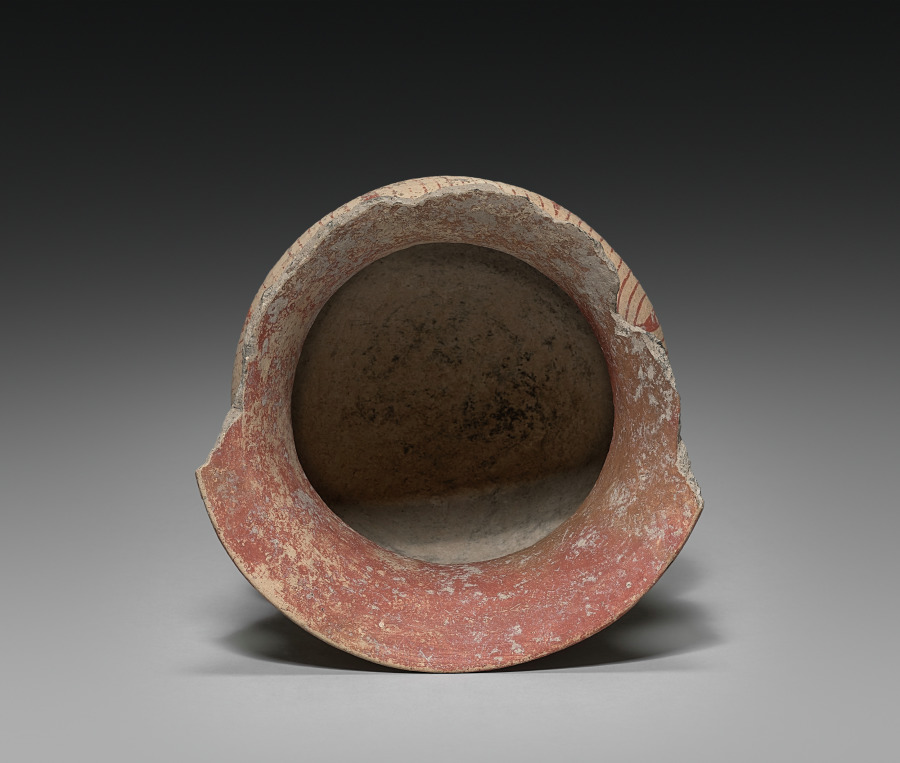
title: Jar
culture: Thailand, Ban Chiang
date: 300 BCE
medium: earthenware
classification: Ceramic